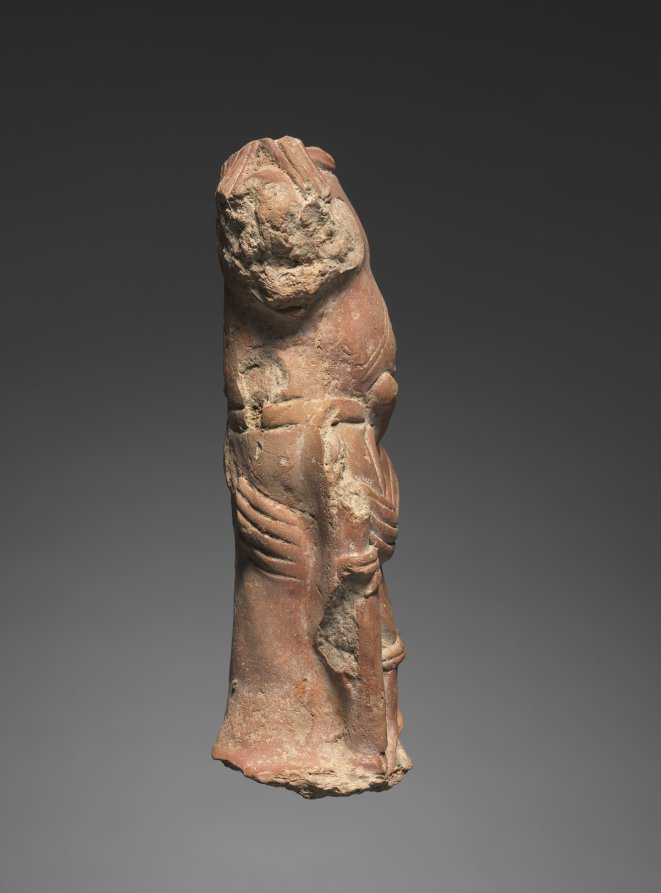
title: Male Fertility Divinity, Possibly Shiva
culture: Northern India, possibly Mathura, Kushan period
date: c. 120–200 CE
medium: terracotta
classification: Sculpture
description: This figure combines an unusual set of attributes. He has long dreadlocks over his shoulders, like an ascetic, and he holds a water pot, like a Brahmin or naga (serpent deity). Also, he seems to carry a sword and dagger like a warrior and is ithyphallic, indicating his virility and fecundity. He may best be identified as a local divinity worshipped for purposes of increasing fertility, but he could also be recognized as an early form of the Hindu god Shiva.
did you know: This sculpture was first made from a mold, then subsequently hand modeled.